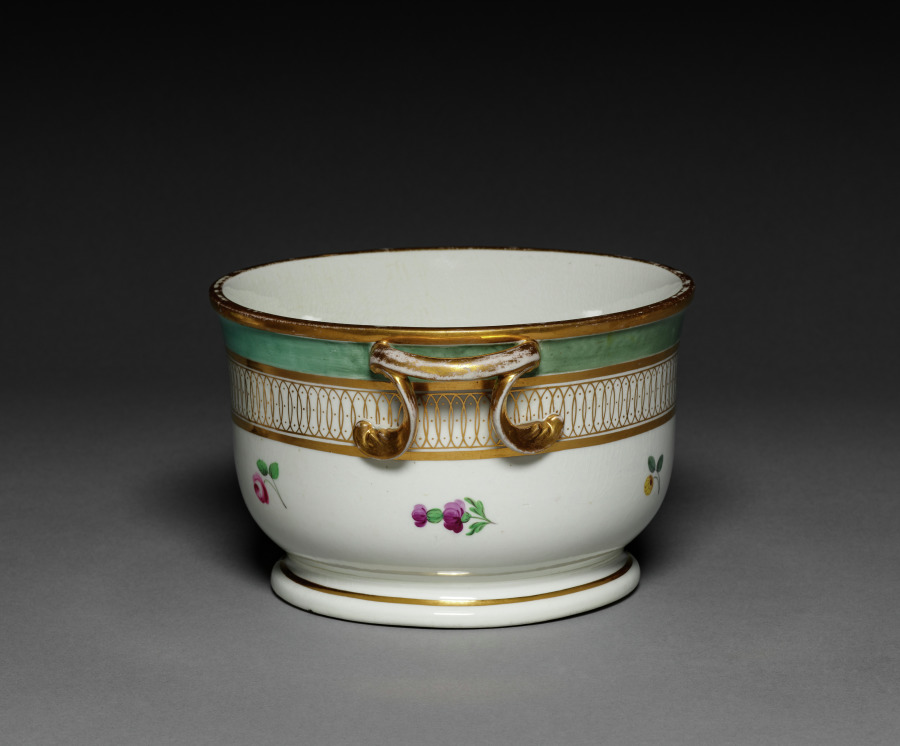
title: Ice Pail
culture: England, Derby, 18th-19th century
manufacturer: Derby (Crown Derby Period) (British)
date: c. 1795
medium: porcelain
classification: Ceramic